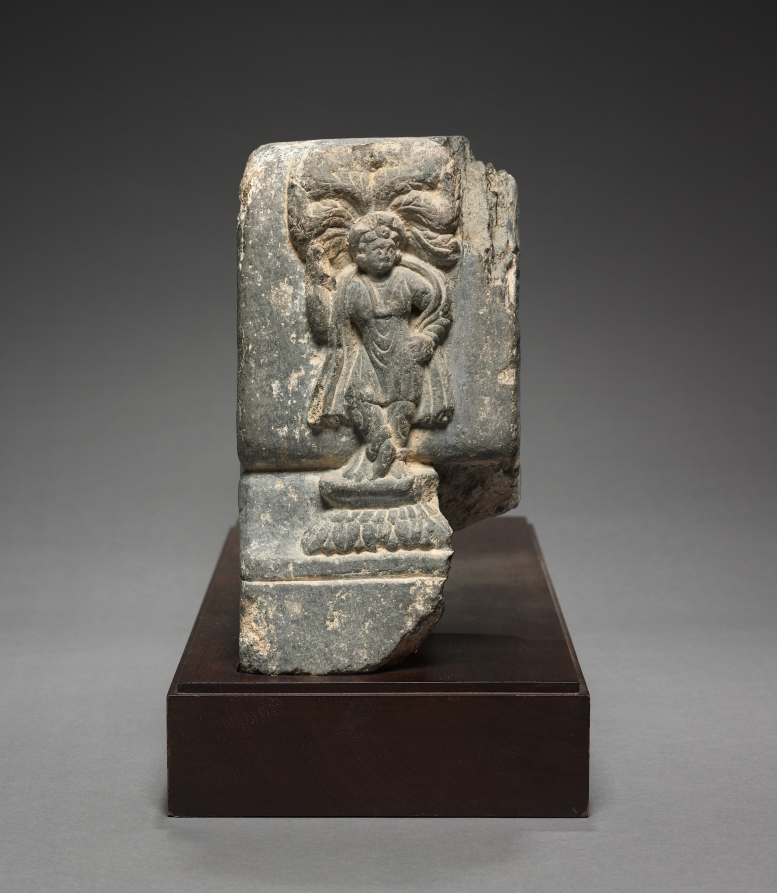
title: Bacchanalian Relief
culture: Pakistan, Gandhara, Kushan period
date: 200s CE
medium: schist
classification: Stone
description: Grape vines create vignettes with scenes of drunken revelry on this architectural carving that once fit by joinery to other carved stone blocks at the base of a Buddhist monument. Bacchus himself, the Greco-Roman god of wine, may be the third figure from the left; bearded, portly, and inebriated, his garment slips as he collapses. Cupid and Aphrodite appear in the vignette on the right next to an amorous couple. On the side is a female nature divinity, grasping the branch of a tree, but unlike her counterparts from farther south in India, she is clothed in a long tunic, pants, and scarf associated with the dress of the Central Asian nomadic groups.